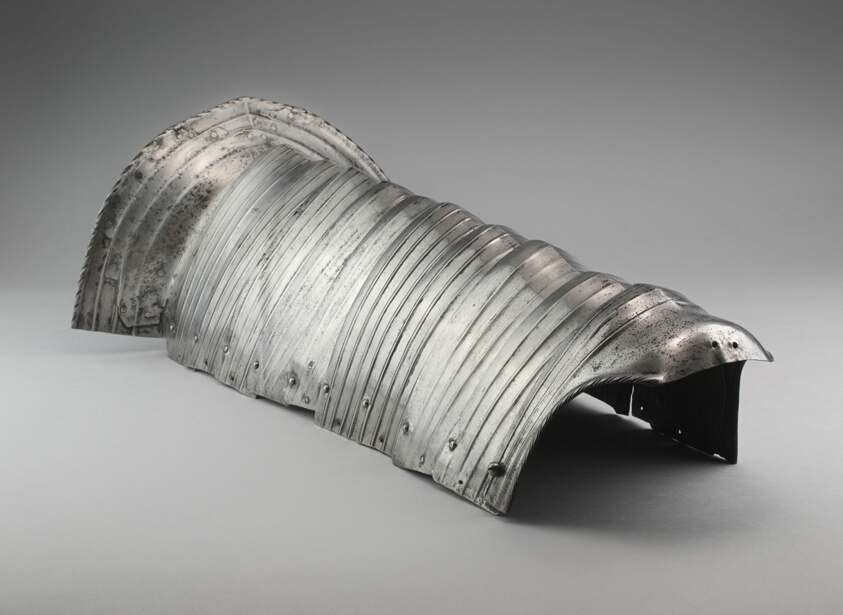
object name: Armor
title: Crinet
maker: German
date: c. 1520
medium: Steel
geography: France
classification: horse equipment; armor; arms and armor